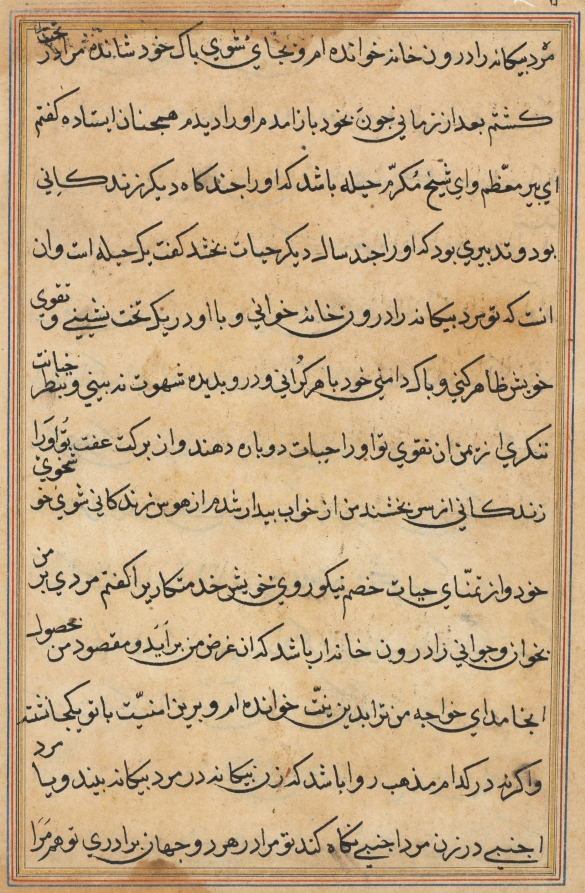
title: Page from Tales of a Parrot (Tuti-nama): text page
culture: Mughal India, court of Akbar (reigned 1556–1605)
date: c. 1560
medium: gum tempera, ink, and gold on paper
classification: Painting